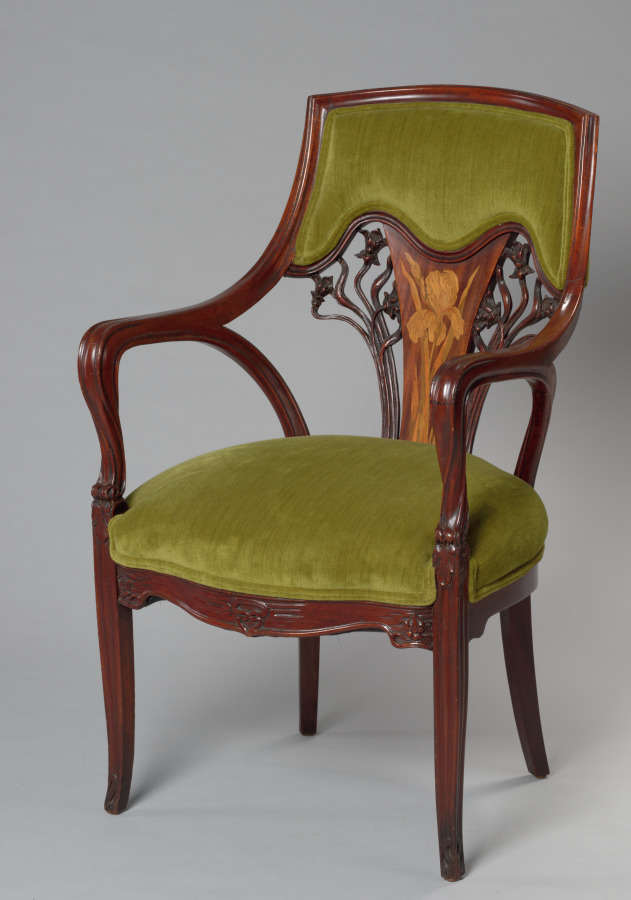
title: Chair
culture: France, Nancy ?, early 20th Century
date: c. 1900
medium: mahogany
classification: Furniture and woodwork